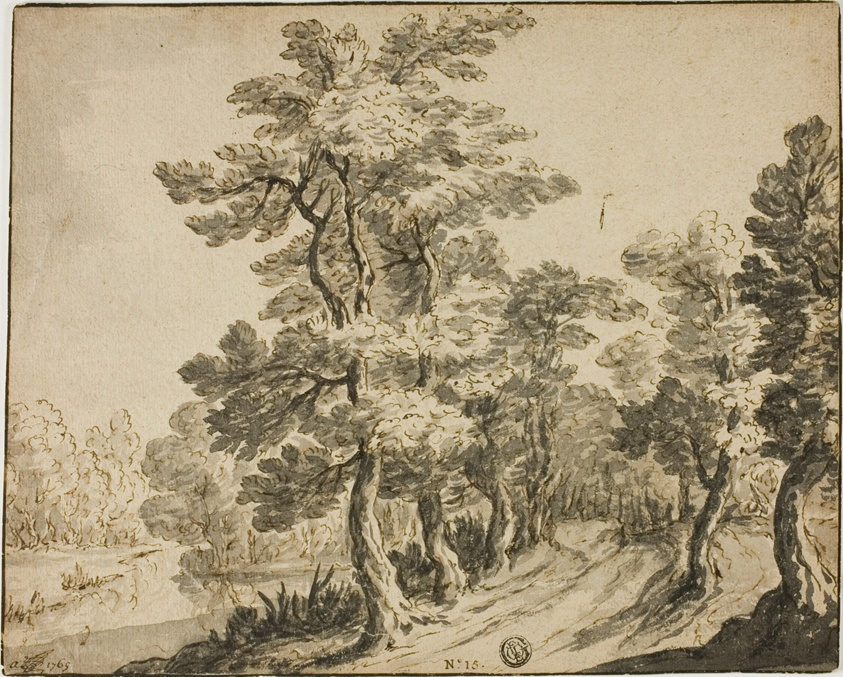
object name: Drawing and Watercolor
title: Road through Leafy Trees near Stream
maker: Zacharias Blyhooft (Dutch, active 1658/59-d. 1680/82)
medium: Pen and brown ink with brush and gray wash on tan laid paper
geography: Holland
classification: ink or chalk wash; drawings (visual works); prints and drawing